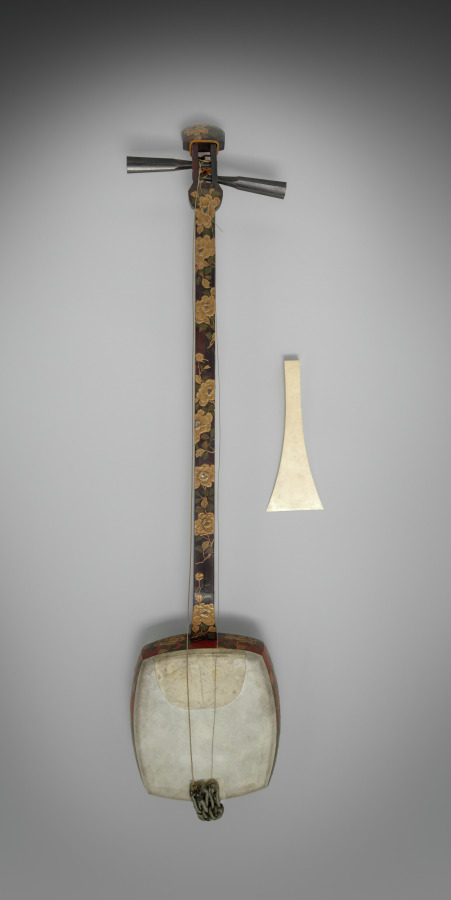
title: Guitar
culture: Japan, Edo period (1615–1868)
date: early to mid-1800s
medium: mixed media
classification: Musical Instrument